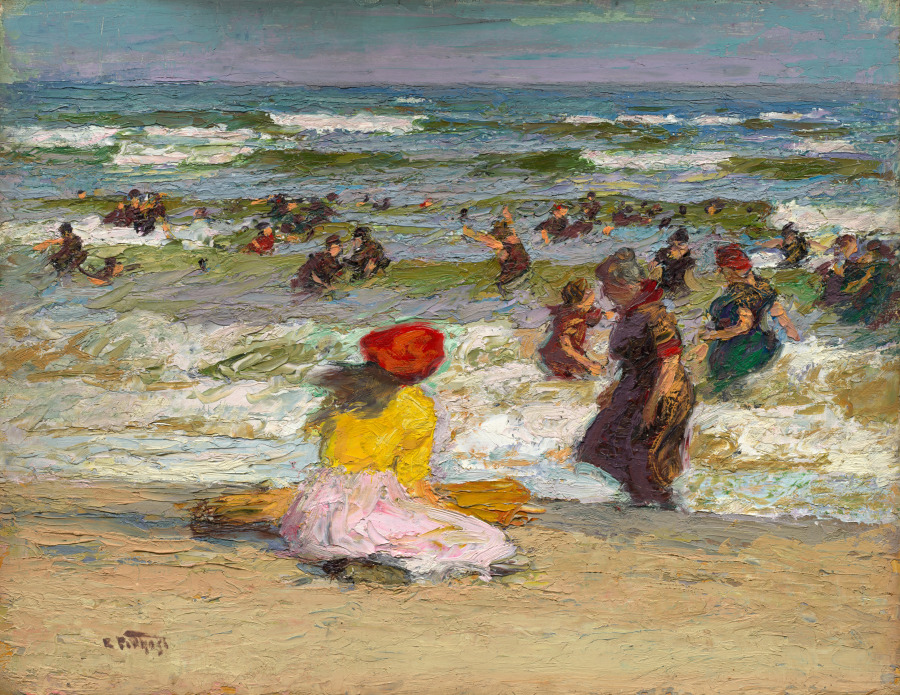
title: In the Surf (recto); Beach Study (verso)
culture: America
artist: Edward H. Potthast (American, 1857–1927)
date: c. 1910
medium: oil on panel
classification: Painting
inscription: recto bottom left: E Potthast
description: Born in Cincinnati, Potthast studied in Munich and Paris before returning to the United States, where he began spending summers along the coast of New England. There he studied the carefree seaside activities of bathers and picnickers. Although he never married, he was particularly fond of painting young mothers and their children.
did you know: During the early 1900s, modesty dictated women’s bathing suit designs featuring long, loose-fitting skirts.